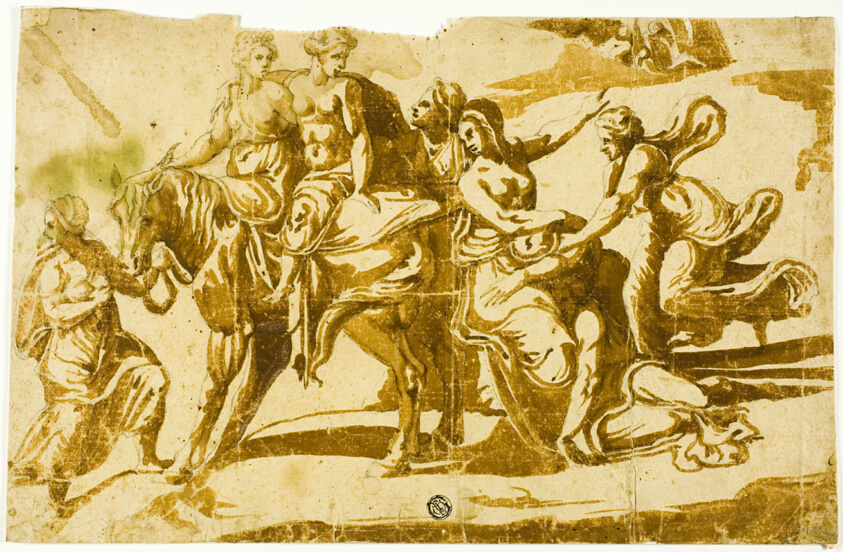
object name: Drawing and Watercolor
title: Flight of Celia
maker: Possibly after Polidoro Caldara, called Polidoro da Caravaggio; Italian, c. 1499-c. 1543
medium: Black chalk and brush and brown wash on tan laid paper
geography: Italy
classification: chalk and wash; drawings (visual works); prints and drawing